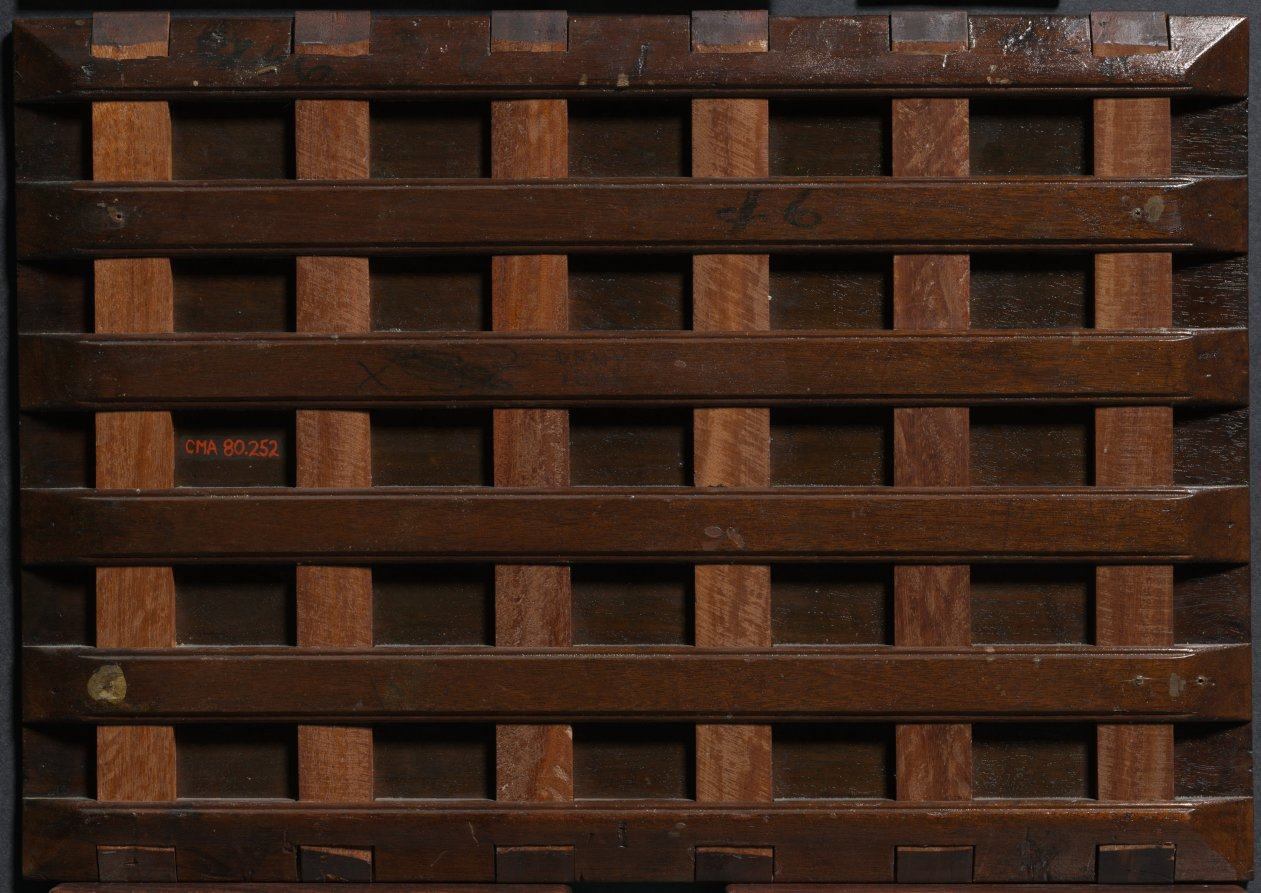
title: Oxen before a Farmhouse at Le Verrier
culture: France, 19th century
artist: Alexandre-Gabriel Decamps (French, 1803–1860)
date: c. 1853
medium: oil on wood panel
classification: Painting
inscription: Signed: lower right in red: decamps.; on cart: Decamps / au Veirier; on sac laying on cart: dc